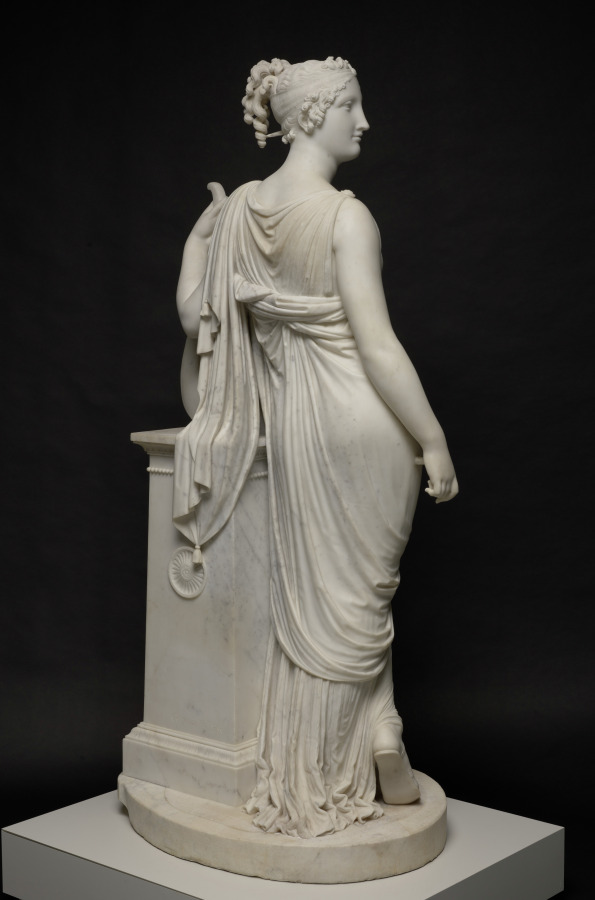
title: Terpsichore Lyran (Muse of Lyric Poetry)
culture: Italy, 19th century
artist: Antonio Canova (Italian, 1757–1822)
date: 1816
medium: marble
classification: Sculpture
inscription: inscribed on front of column: "Terpsichore Lyran" [Terpsichore as the Muse of lyric poetry]; inscribed at base of column: "Canova Fact: 1816"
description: In Greek mythology, Terpsichore was one of the nine Muses, or goddesses of creative inspiration. The lyre, the Greek inscription on the short column, and the caduceus (entwined snakes) on the side identify the figure as Terpsichore Lyran, muse of lyric poetry. This sculpture began with a commission from Napoleon's brother, Lucien, for an idealized portrait of his wife, Alexandrine. Antonio Canova made this version for a British aristocrat and exhibited it in 1817 at the Royal Academy in London to great acclaim.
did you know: Trained by his grandfather, an Italian stonemason, Canova began modeling clay and carving marble sculptures before age ten.